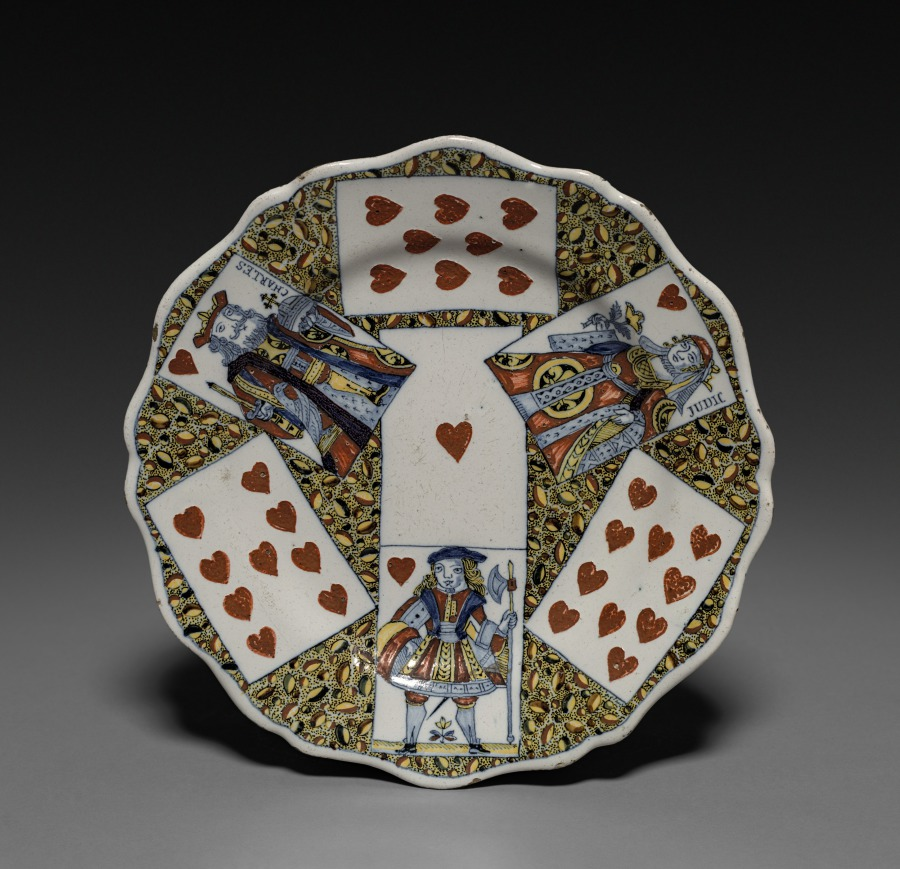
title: Plate with Playing Cards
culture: France, Lille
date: c. 1760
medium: faience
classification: Ceramic